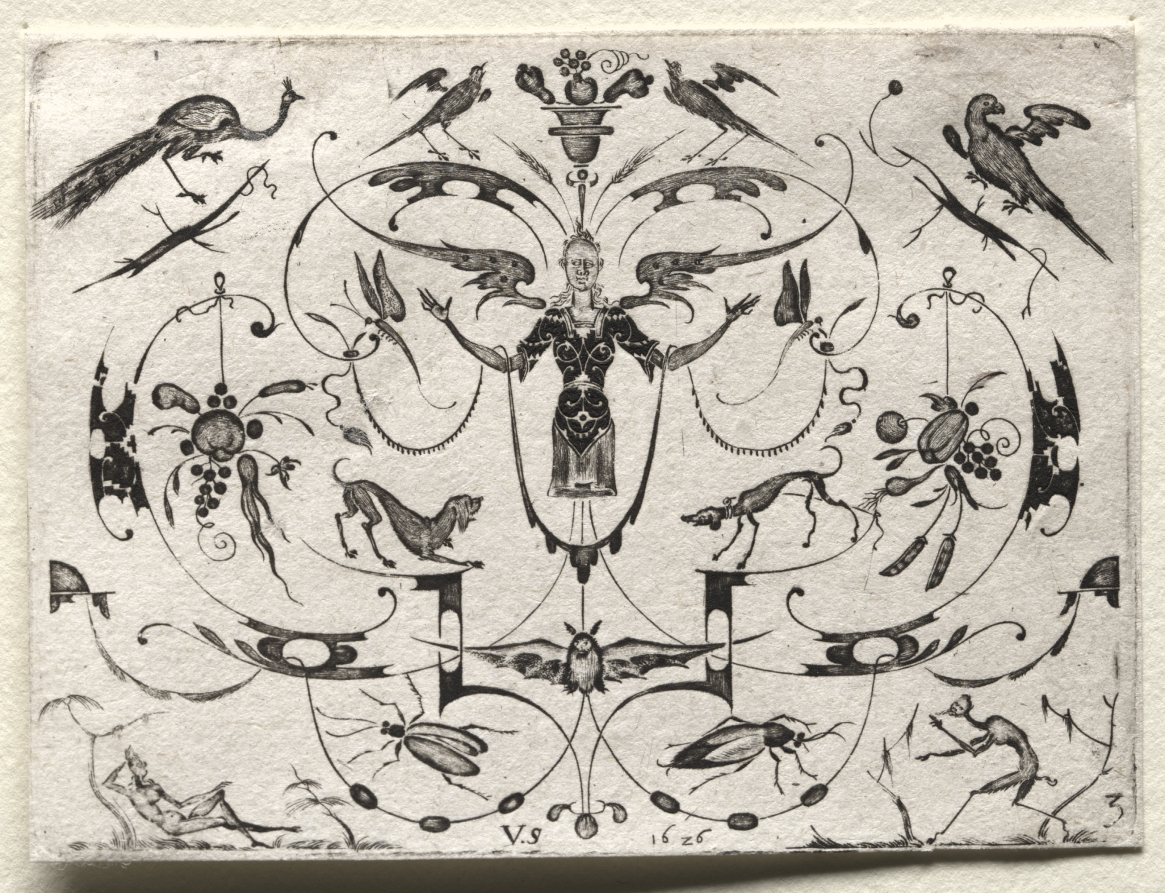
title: Arabesque with Peacock, Parakeet, Dogs and Insects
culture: Germany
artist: Valentin Sezenius (German)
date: 1626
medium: engraving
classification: Print